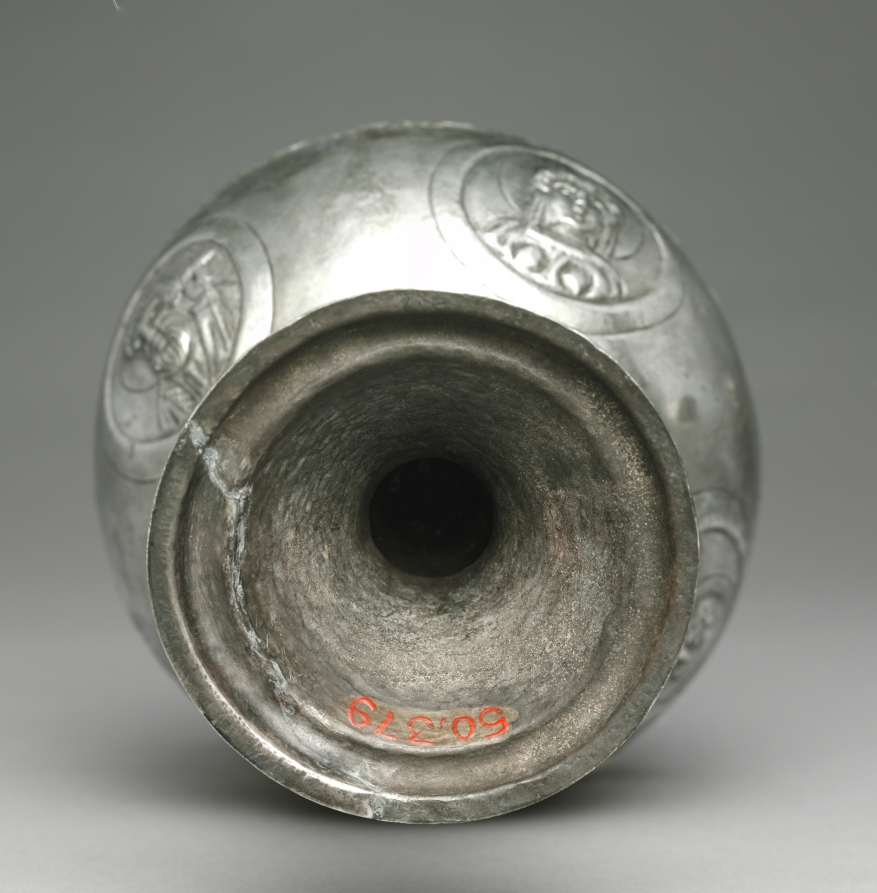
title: Chalice from the Beth Misona Treasure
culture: early Byzantium, Constantinople or Syria, Byzantine period, 6th-7th Century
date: c. 500–700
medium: silver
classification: Metalwork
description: These four liturgical silver vessels—a paten and three chalices (1950.378–81)—form what is now called the Beth Misona Treasure, named for the village in northern Syria for which the objects were made. While nothing is known about the exact location and circumstances of the treasure's discovery, the people of the village of Beth Misona were, like other Christian communities in Syria and Palestine, probably forced to bury their church silver to hide it from the Persians or Arabs, who conquered their lands in the first half of the 600s. The paten, which held pieces of Eucharistic bread used during Mass, is decorated with an engraved Latin cross surrounded by a dedicatory inscription that names the paten's donor—Domnos—and its original location, the church of Saint Sergios in Beth Misona. The chalices, which contained the Eucharistic wine used during Mass, feature broad cups decorated with portrait busts of Saints Peter and Paul, Christ, and the Virgin. One chalice bears a dedicatory inscription naming its donor—Kyriakos, Domnos's son—and the priest of the church that received the pious gift—Zeno.